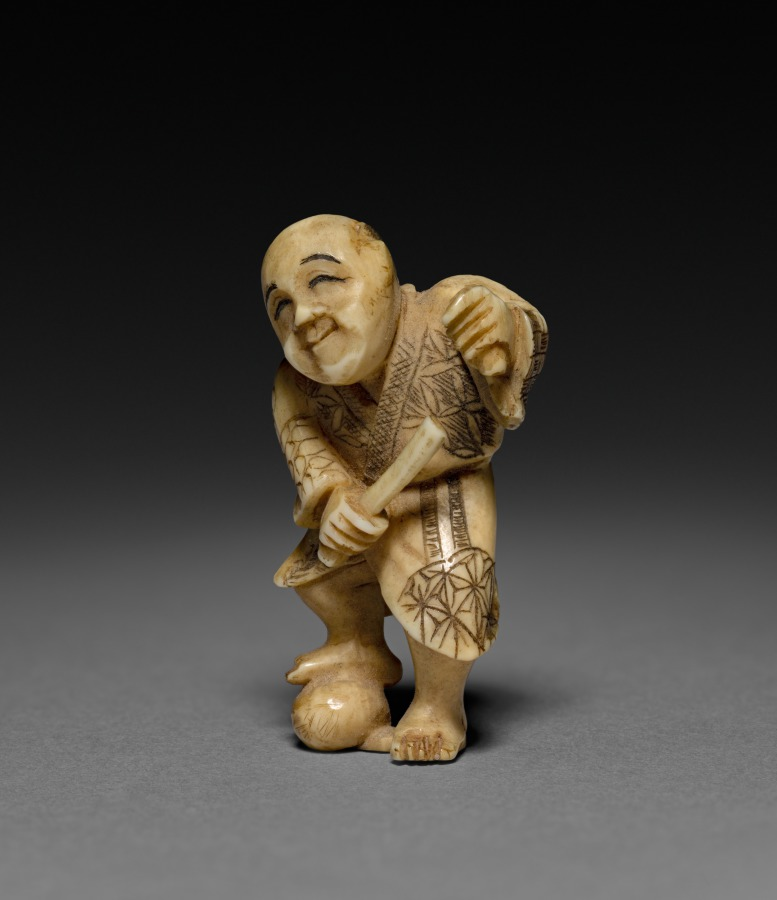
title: Netsuke of Man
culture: Japan, Meiji period (1868–1912)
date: 1900s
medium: ivory, pigment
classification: Ivory